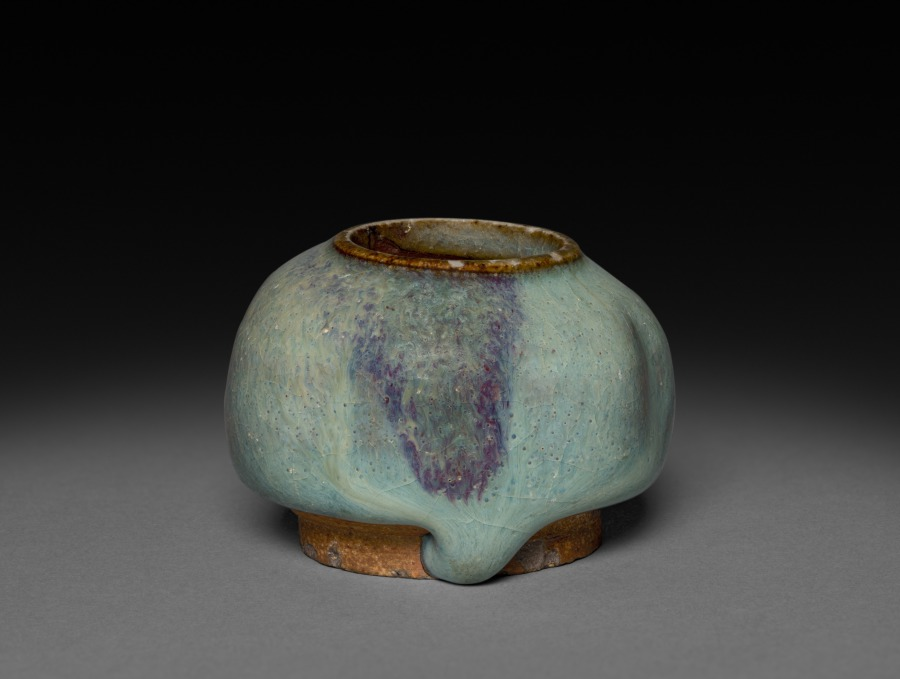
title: Small Lobed Jar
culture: Northern China, Jin dynasty (1115-1234) - Yuan dynasty (1271-1368)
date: 1115–1368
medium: glazed buff stoneware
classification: Ceramic